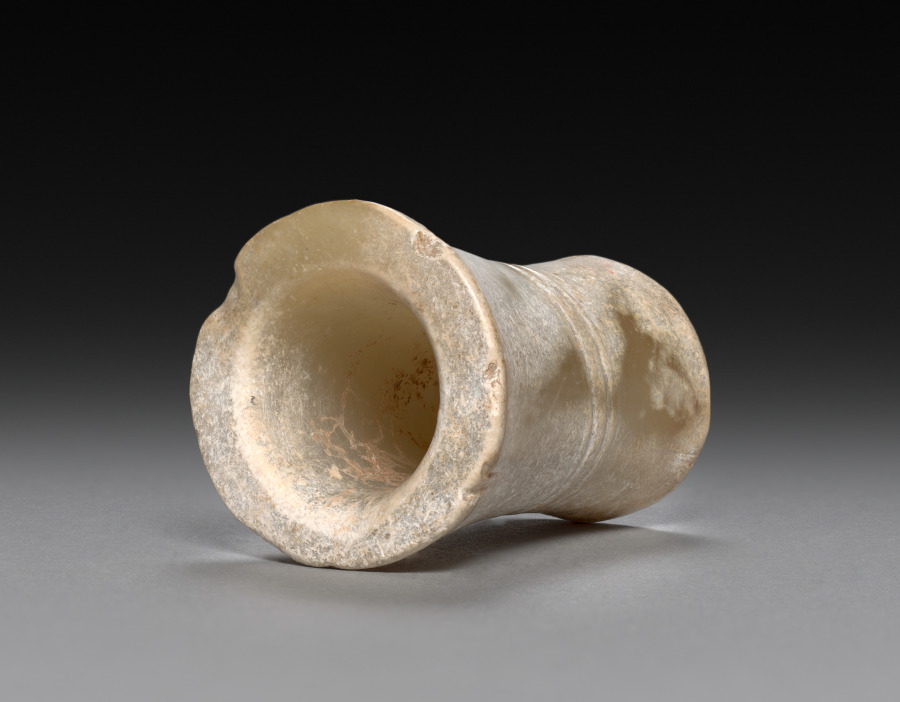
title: Bead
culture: China, Shang dynasty (c. 1600–c. 1046 BCE) to Zhou dynasty (c. 1046–256 BCE)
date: c. 1200–900 BCE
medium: jade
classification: Jade